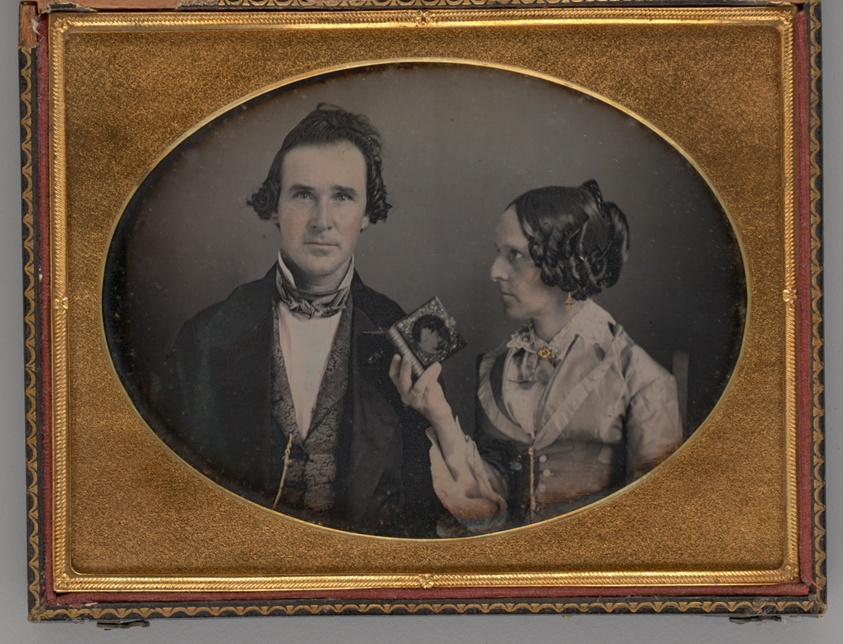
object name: Photograph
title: Untitled (Portrait of a Man and a Woman)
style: 19th century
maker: Unknown maker; American, 19th century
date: 1851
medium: Daguerreotype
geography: United States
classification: portrait; photograph; photographic process; photography; portrait; daguerreotype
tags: lundberg collection, portraits, couples, portrait, portraits: multiple subjects